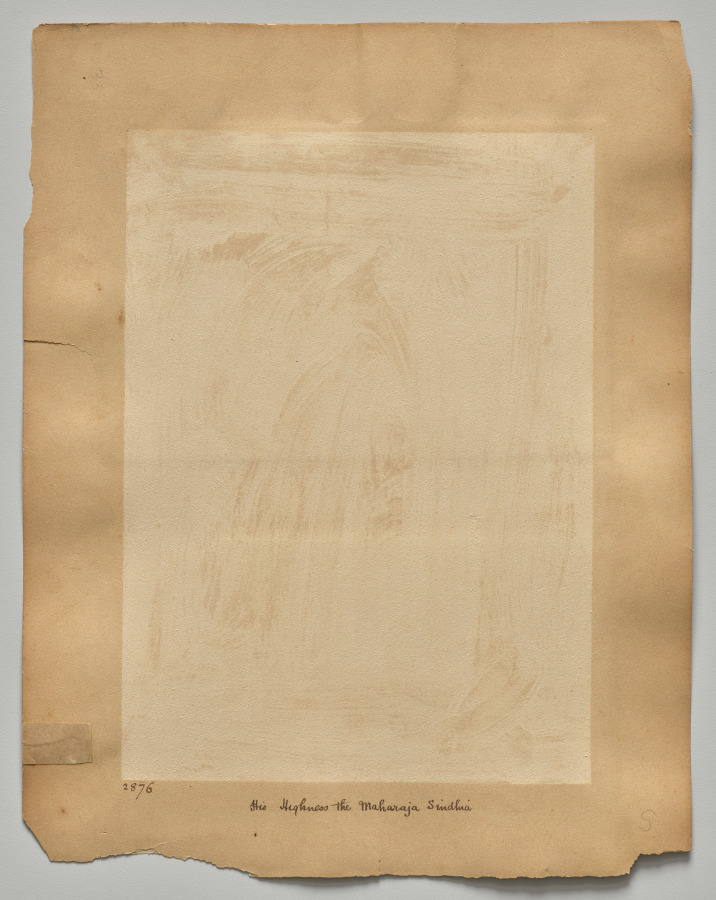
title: Col. F. G. Oldham (recto, top); Mr. Nowell, Shimla (recto, bottom)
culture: India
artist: Raja Deen Dayal (Indian, 1844–1905)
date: c. 1882–87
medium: albumen print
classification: Photograph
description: These photographs are part of an album, now disassembled, of around 105 photographs taken in India between 1885 and summer 1887 that provide glimpses into the lives of the British colonial elite and royal and upper-class Indians. The museum holds another group of 37 pictures from this album (2016.266), which was probably commissioned by a British civil servant visiting or working in India around 1888 as a personal souvenir of his experiences there.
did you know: Raja Deen Dayal is regarded now, and was considered during his lifetime, to be India’s most important 19th-century photographer.